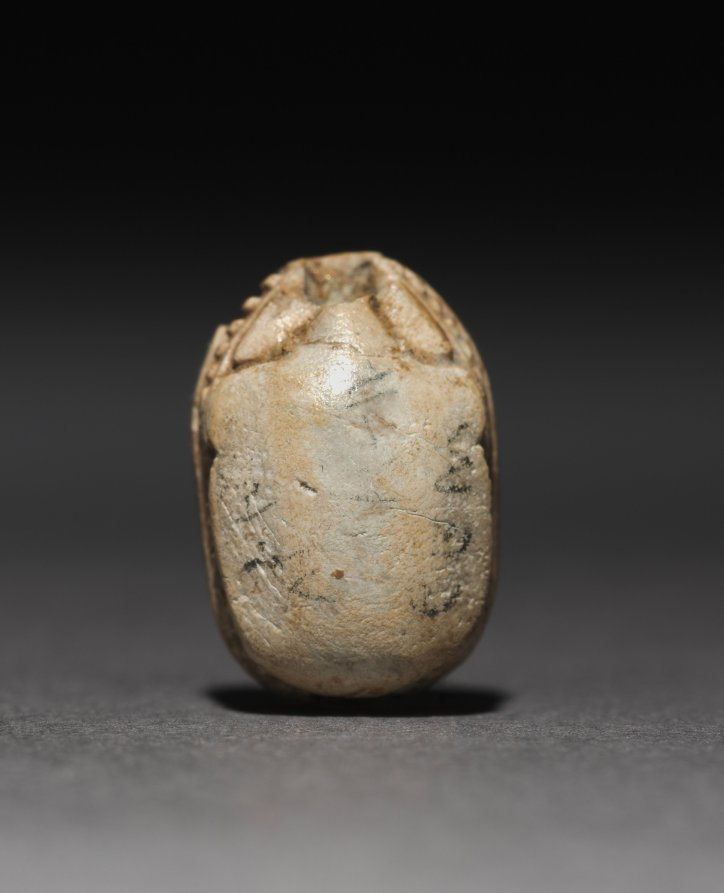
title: Scarab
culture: Egypt, Haraga, Wadi I, no number, Second Intermediate period (1648–1540 BCE)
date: 1648–1540 BCE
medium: turquoise-glazed steatite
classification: Scarabs